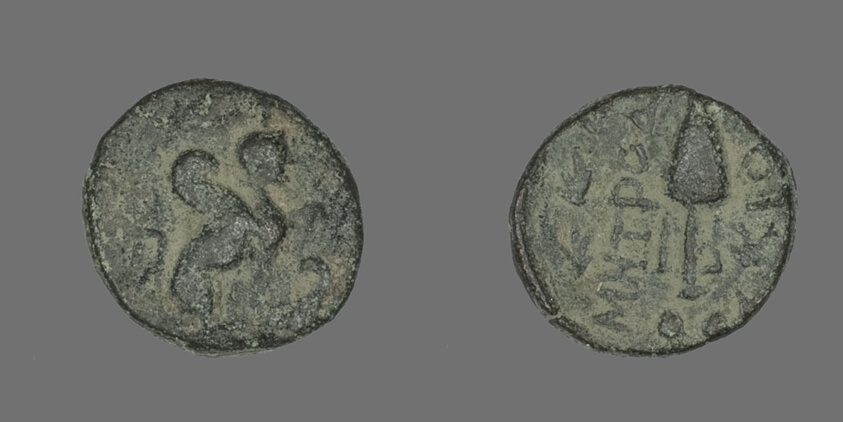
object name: Coin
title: Coin Depicting Sphinx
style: greek, ancient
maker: Greek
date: after 84 BCE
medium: Bronze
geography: Ancient Greece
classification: coin; ancient art